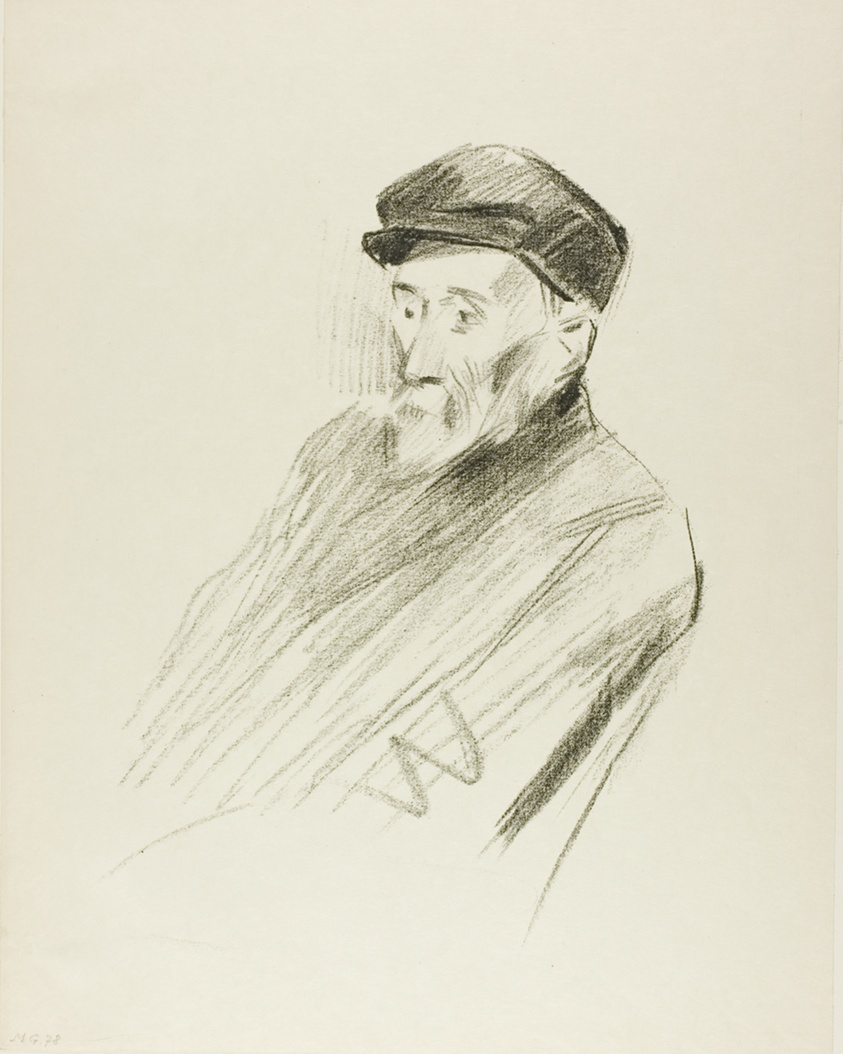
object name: Print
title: Portrait of Renoir, Third Plate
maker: Jean Louis Forain (French, 1852-1931)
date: 1905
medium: Lithograph on cream wove paper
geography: France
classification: lithograph; print; prints and drawing